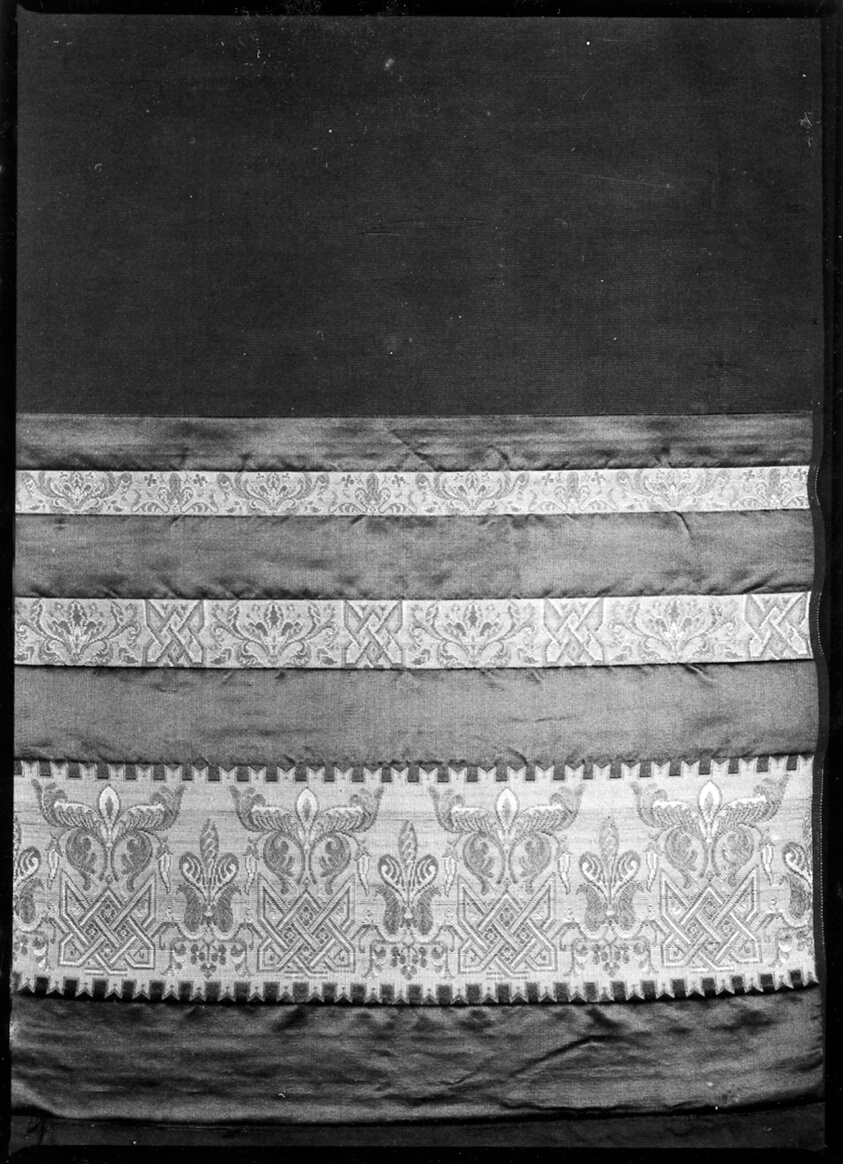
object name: Textile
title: Panel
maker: United States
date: c. 1890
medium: Silk and wool, bands of warp-float faced satin weave; plain weave with supplementary patterning warps; and double-faced four-color complementary weft plain weave; woven on loom with Jacquard attachment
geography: United States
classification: textile; weaving